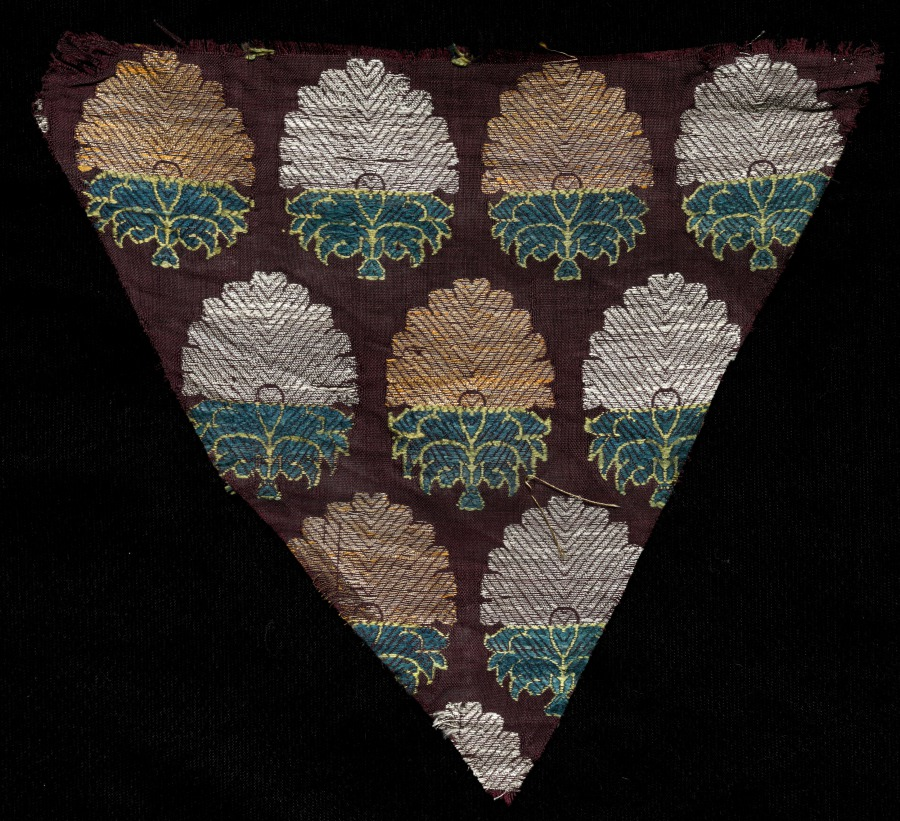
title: Fragment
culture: India, 19th century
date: 1800s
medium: brocade, "kimkhwab"; silk and gold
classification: Textile